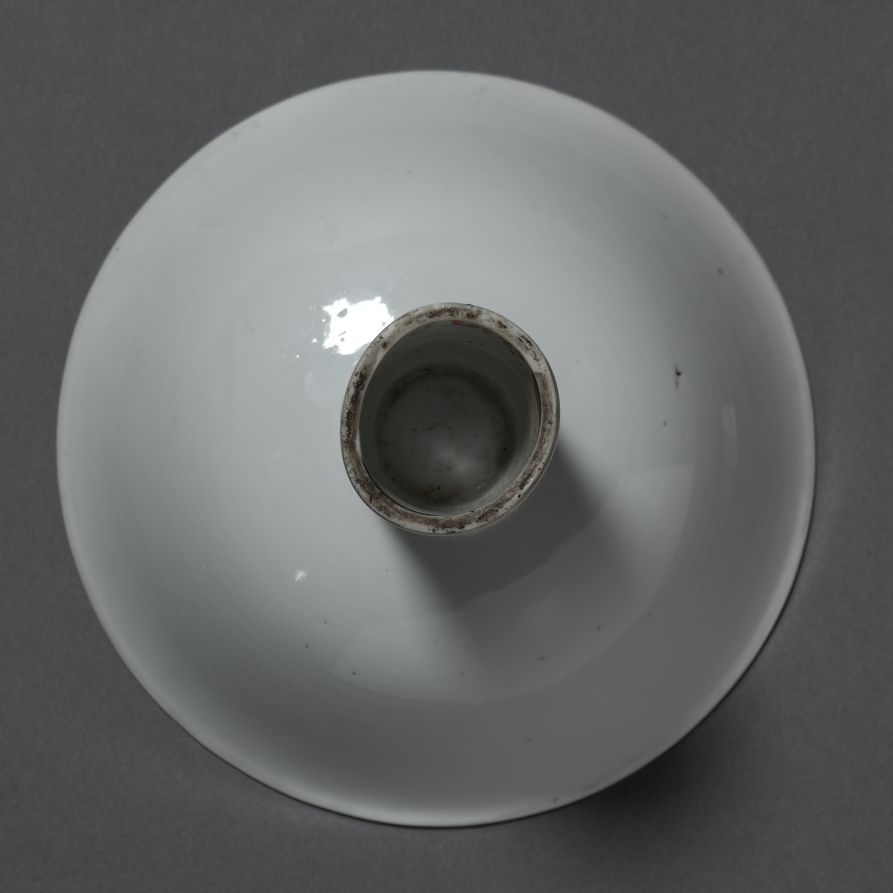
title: Stem Cup with Buddhist Emblems: Shufu Ware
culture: China, Jiangxi province, Yuan dynasty (1271-1368)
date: 1300s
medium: porcelain with molded decoration and white glaze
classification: Ceramic